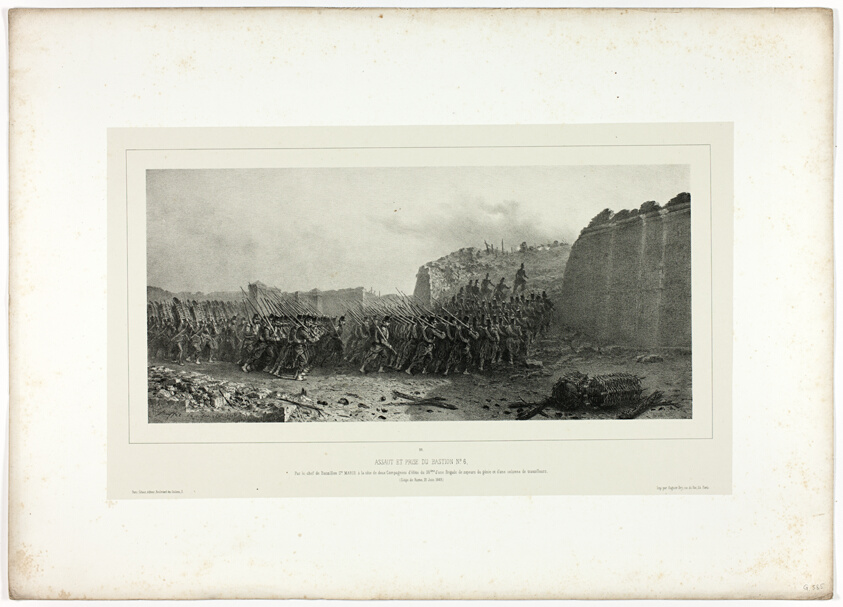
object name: Print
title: Assault and capture of bastion no. 6, from Souvenirs d’Italie: Expédition de Rome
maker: Denis Auguste Marie Raffet (French, 1804-1860); printed by Auguste Bry (French, 19th century); published by Chez Gihaut Frères (French, 19th century)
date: 1858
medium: Lithograph in black on warm ivory wove chine laid down on off-white wove paper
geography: France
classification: lithograph; print; prints and drawing